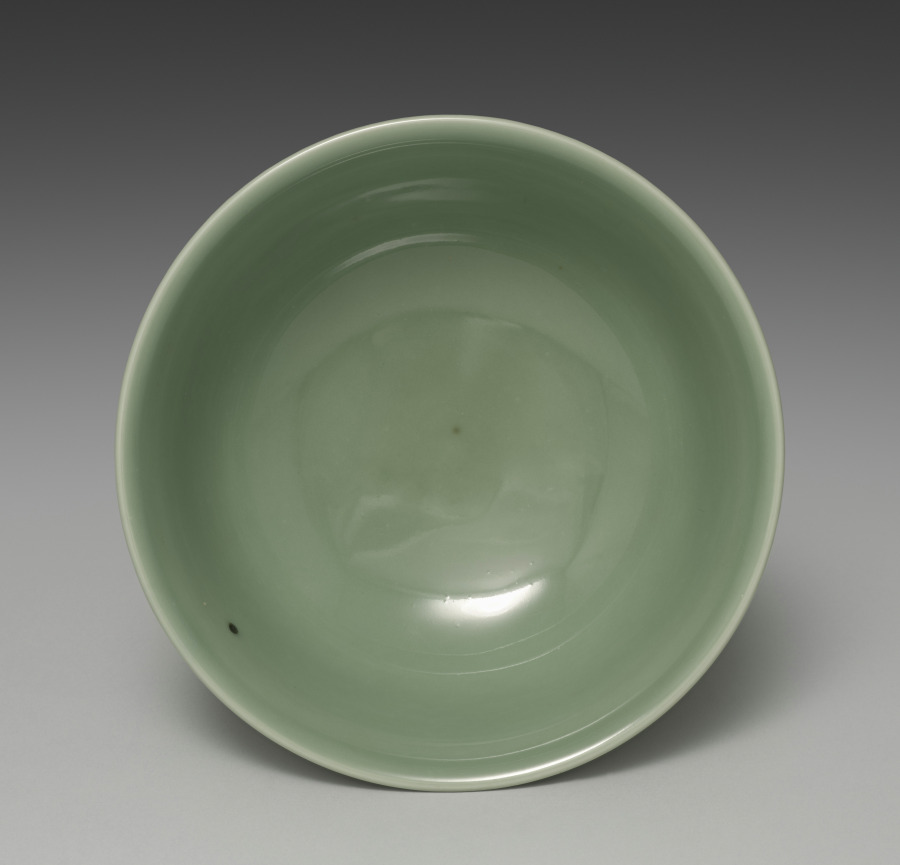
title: Dining Bowl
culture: Japan, Meiji period (1868–1912)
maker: Seifū Yohei III (Japanese, 1851–1914)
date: 1912–14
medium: Porcelain with green glaze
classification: Ceramic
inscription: 共箱の箱書：（蓋表）秘色彩古磁盂（印：清風）；（蓋裏）清風制之（印：帝室技藝員）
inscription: 彫銘：清風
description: This Yohei III dining bowl with an everted rim has a glaze identified in its box lid inscription as hisoku (C. mise), or “mysterious color.” This name typically refers specifically to a type of high-quality, green-glazed ceramic produced in the ninth and tenth centuries at the Yue kilns in China’s Zhejiang Province as tribute ware for the imperial family.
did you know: Many ceramics created by the Seifū Studio refer to and emulate Chinese ceramics in form and glazing.